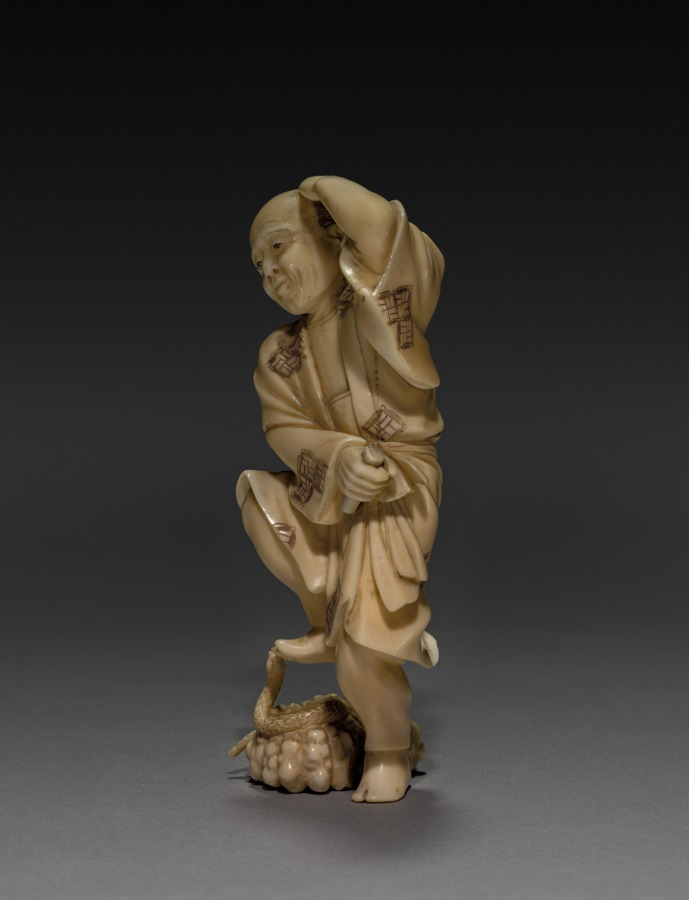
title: Man and Serpent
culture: Japan, Meiji period (1868–1912)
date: early 1900s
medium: ivory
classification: Ivory